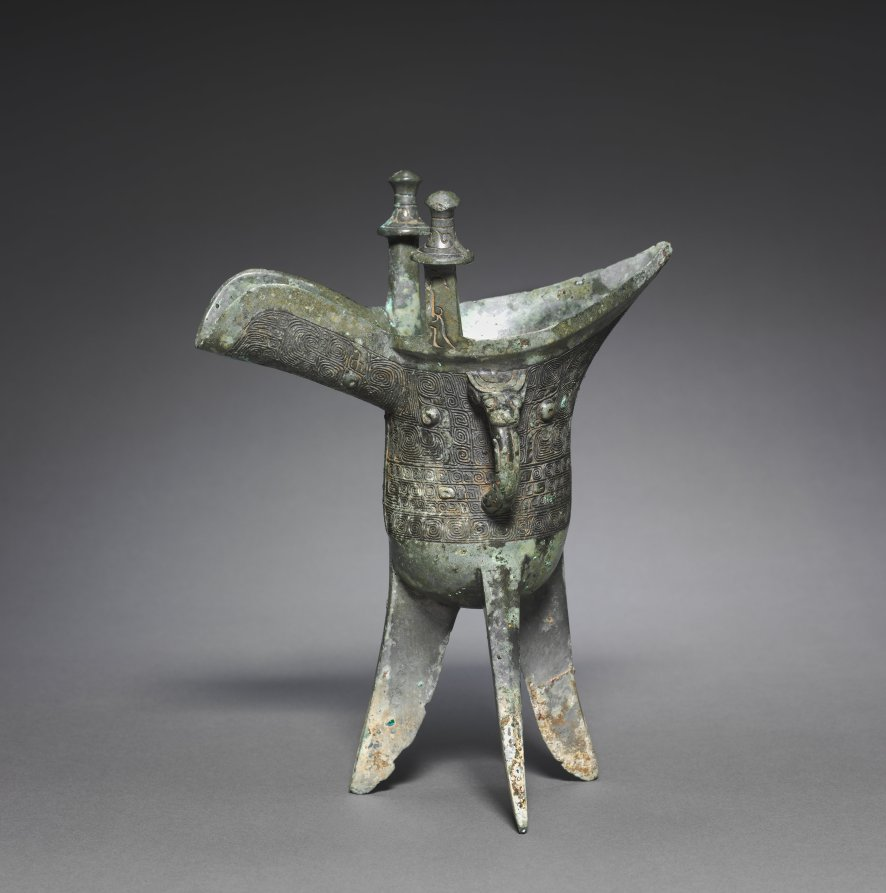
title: Wine vessel (Jue)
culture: China, Shang dynasty (c. 1600–c. 1046 BCE)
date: c. 1200 BCE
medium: bronze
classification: Metalwork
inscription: Inscription reads: Chu fu Yi (Father Yi of the Chu Clan)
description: Wine and food played a major role in ritual offerings to the ancestral spirits and the Supreme Ancestor (Shangdi) performed by the Shang rulers in the state cult of ancestor worship. A variety of wine vessels—each type given a specific name—was cast to bear witness to the power and artistic vitality of this remote civilization. This example of a jue wine cup is for libations. Other types of wine vessels include jia (wine warming vessel), fangyou (square wine container), and gu (beaker with a trumpeted mouth for pouring).